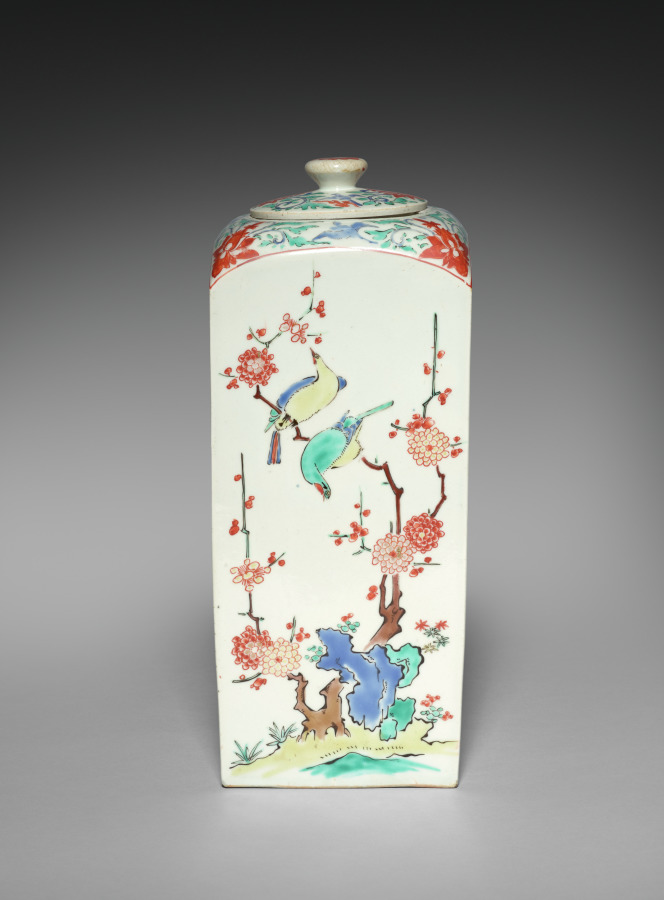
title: Square Jar with Birds and Flowers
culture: Japan, Edo period (1615–1868)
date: late 1600s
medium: Porcelain with overglaze color enamels and gold (Hizen ware, Kakiemon type)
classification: Ceramic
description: This lidded square jar was likely paired with a complementary yet nonidentical mate. The pine tree, plum, and bamboo together form the frequently depicted motif known as the Three Friends of Winter (shōchikubai), so named because of their hardy perseverance in the cold. Each side also features a pair of birds, including cranes on one face and pheasants on another.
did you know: A jar like this was fired at a high temperature, painted with colored enamels, and then fired again at a lower temperature.